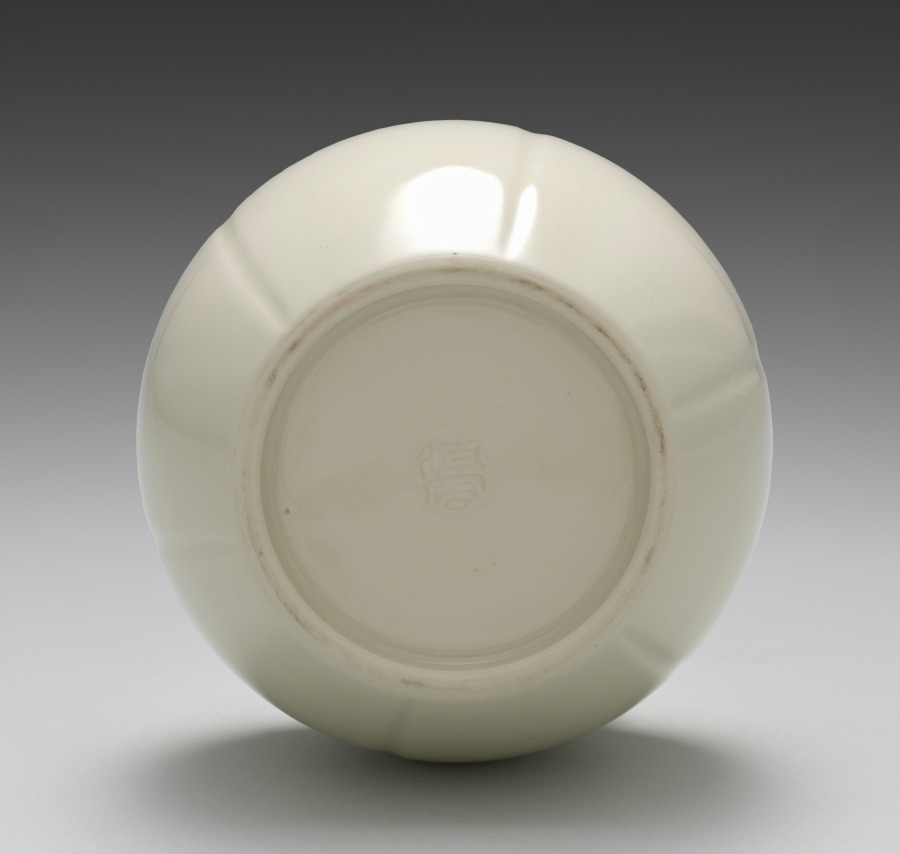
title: Container from Lit Charcoal and Ash Containers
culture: Japan, Meiji period (1868–1912)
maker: Seifū Yohei III (Japanese, 1851–1914)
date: 1893–1914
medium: One from a set of four containers; porcelain with molded design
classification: Ceramic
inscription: 清風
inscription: The storage box for this set is inscribed and impressed with seals.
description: The box lid for these six-lobed lit charcoal and ash containers, or hiire, identifies them as kōhakuji, another of Yohei III’s translucent cream colors over ivory clay bodies. One might translate the name as “lustrous pearl[–glazed ivory] porcelain.” A hiire was filled with ash with burnt coals at the center so that embers and tobacco ash could be discarded safely during a gathering. Each of the lobes on the containers has a round protrusion set below the rim. The studlike pattern is called ruiza. The term is also used to describe the pattern that rings the shoulder of some flower vases or metal kettles used in chanoyu.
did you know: The Seifu studio generally followed the standard practice in Japan for identifying the artist and object in box inscriptions.